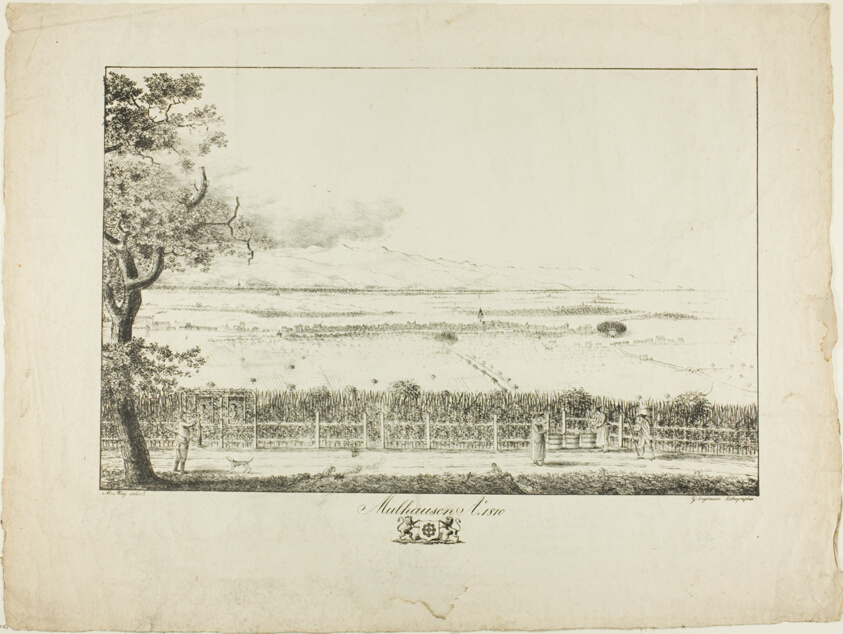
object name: Print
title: View of Mulhouse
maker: Mathieu Mieg (French, 18th-19th century); possibly after Jean Mieg (French, 1791-1862); printed by Gotfried Engelmann (French, 1788-1839)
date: 1810, printed 1814/16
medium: Lithograph in black on ivory wove paper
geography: Paris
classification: lithograph; print; prints and drawing